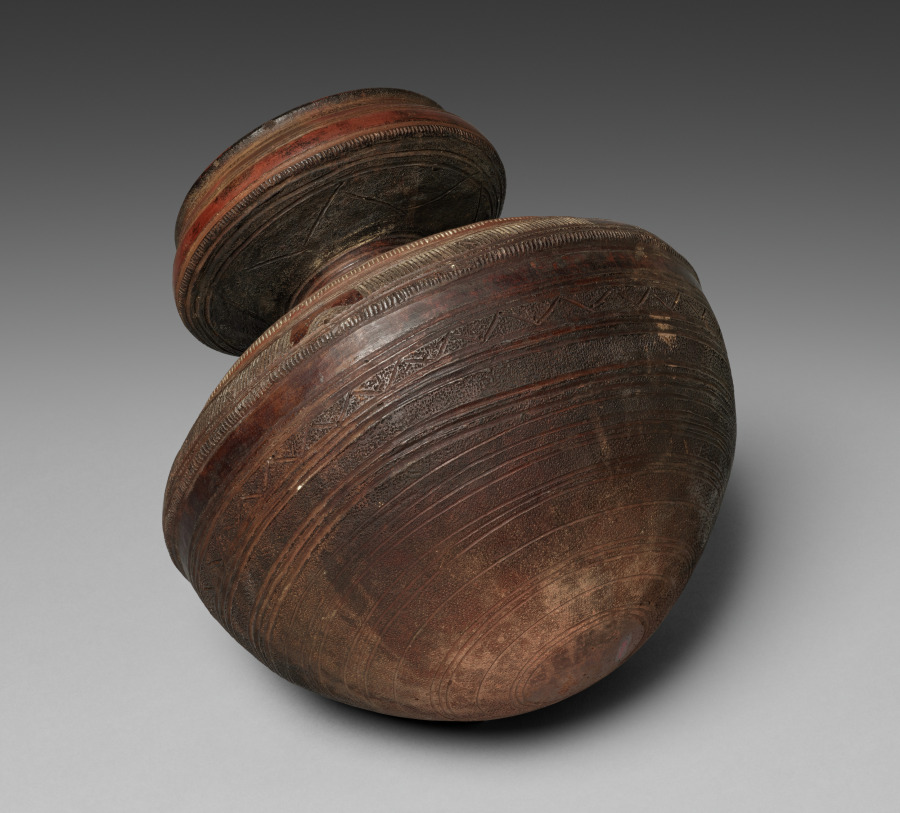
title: Water Transport Jar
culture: Africa, West Africa, Nigeria, Nupe-style pottery, unknown female potter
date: 1900s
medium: Terracotta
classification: Vessels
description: The Nupe, an Islamic people from northern Nigeria, embellish pottery and metalwork with intricate, nonrepresentational patterning. A female potter built this vessel by joining two bowls into a globe shape, then adding the neck. After drying, she used shells to press in designs before burnishing the exterior to a high shine. Finally, she fired the gourd-shaped vessel in a furnace. The patterns beautify and allow a firm grip when lifting the vessel. As the Gwari and Nupe people are neighbors, pottery shapes and designs often transferred between them. Look for similar zigzags and concentric lines on the nearby Gwari-inspired vessels.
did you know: The shape of this vessel probably developed from real gourds used to hold liquids.